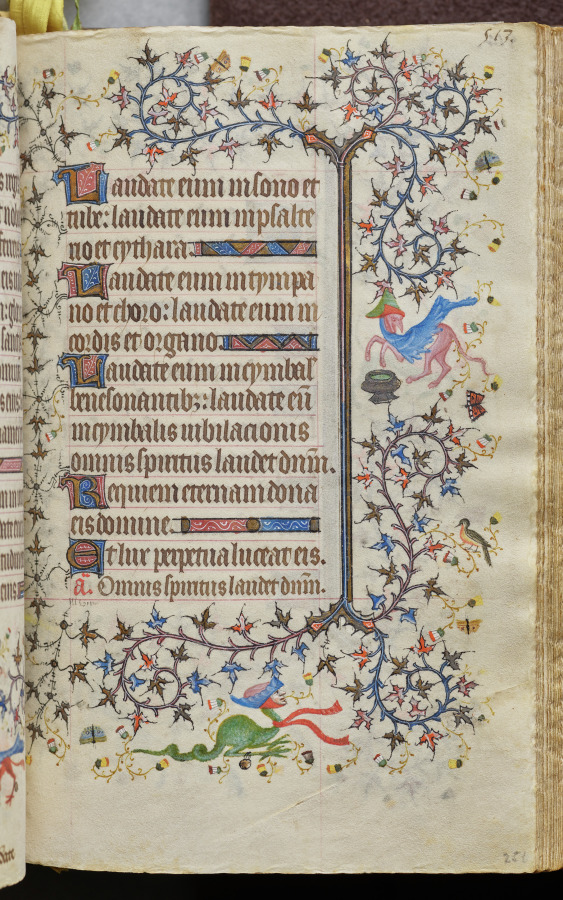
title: Hours of Charles the Noble, King of Navarre (1361-1425): fol. 251r, Text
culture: France, Paris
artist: Master of the Brussels Initials and Associates (French)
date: c. 1405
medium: ink, tempera, and gold on vellum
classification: Bound Volume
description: This precious volume was obviously highly prized by its owner, the French-born King of Navarre, who had his coat of arms painted on no less than twenty folios. Rather than directly commissioning this manuscript from a specific workshop, it seems that Charles the Noble acquired his book of hours -- perhaps ready-made for the luxury market -- while on a trip to Paris in 1404-05. A collaborative effort, six painting styles are evidenced within the pages of this codex, those of two Italians, two Frenchmen, and two Netherlanders. The painter who was responsible for the planning and decoration of the book, and who produced seventeen of the large miniatures, was a Bolognese artist known as the Master of the Brussels Initials. His principal assistant, responsible for most of the borders, was a Florentine who signed his name "Zecho" da Firenze on folio 208 verso.